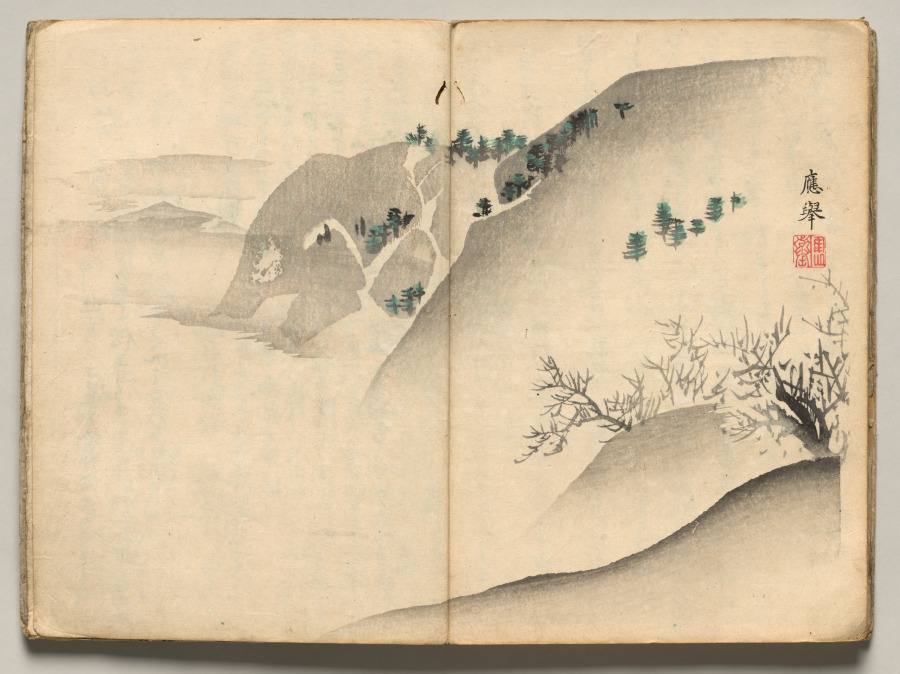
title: Landscape from Ōkyo Picture Book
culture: Japan, Edo period (1615–1868)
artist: after Maruyama Ōkyo (Japanese, 1733–1795)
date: 1850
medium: accordion-style woodblock printed folding-book; ink and color on paper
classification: Bound Volume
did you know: This impression of a book of woodblock-printed designs is missing a spread that depicts a crane.